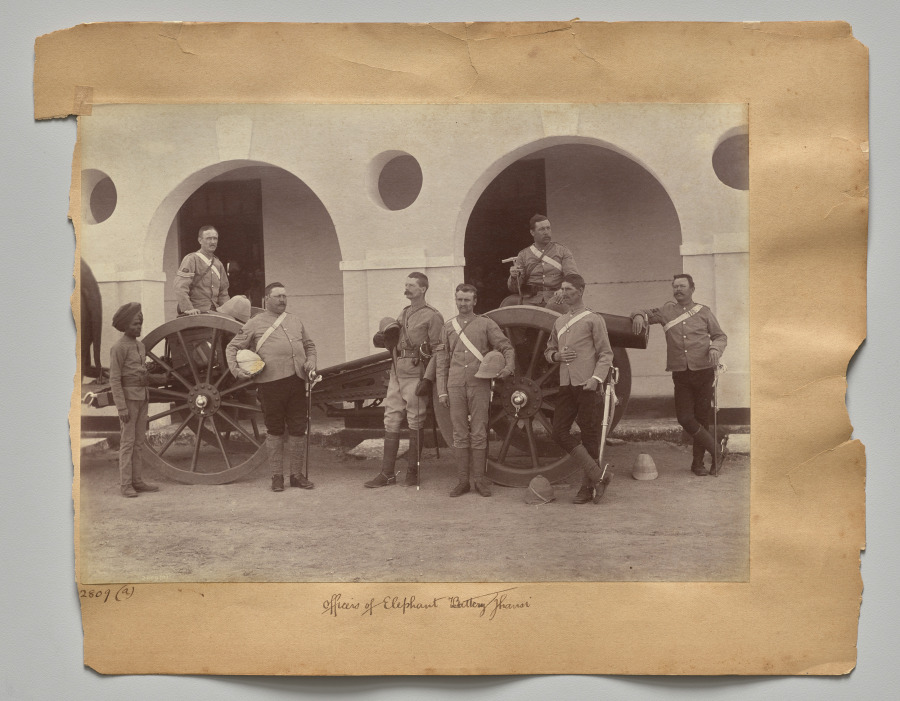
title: Officers of Elephant Battery, Jhansi (recto)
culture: India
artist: Raja Deen Dayal (Indian, 1844–1905)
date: c. 1882–87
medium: albumen print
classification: Photograph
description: These photographs are part of an album, now disassembled, of around 105 photographs taken in India between 1885 and summer 1887 that provide glimpses into the lives of the British colonial elite and royal and upper-class Indians. The museum holds another group of 37 pictures from this album (2016.266), which was probably commissioned by a British civil servant visiting or working in India around 1888 as a personal souvenir of his experiences there.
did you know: Raja Deen Dayal is regarded now, and was considered during his lifetime, to be India’s most important 19th-century photographer.